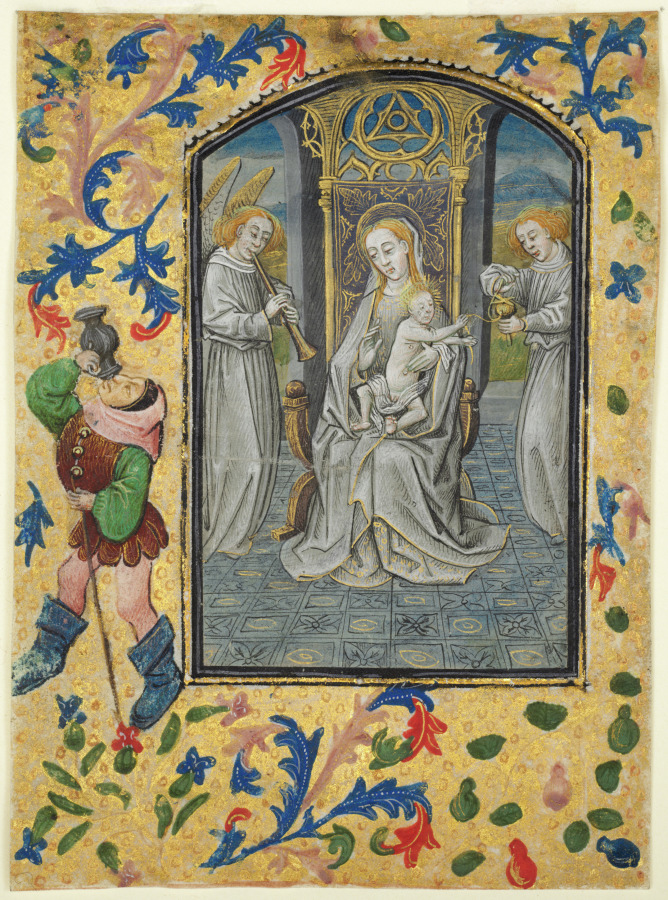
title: Leaf from a Book of Hours: Virgin and Child Enthroned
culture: Flanders, Bruges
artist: circle of Guillaume Vrelant (Flemish, c. 1454–1481)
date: c. 1470–1480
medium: tempera, liquid gold, and grisaille on vellum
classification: Manuscript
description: Guillaume Vrelant, born in Utrecht, was known to be in Bruges from 1454 onward where he died around 1481. He probably went there to sidestep a 1427 law which banned the sale of Utrecht images. A painter very much in vogue, he founded the Illuminators’ Guild in Bruges under the patronage of Saint John the Evangelist. He is known to have provided manuscripts to the Burgundian court.